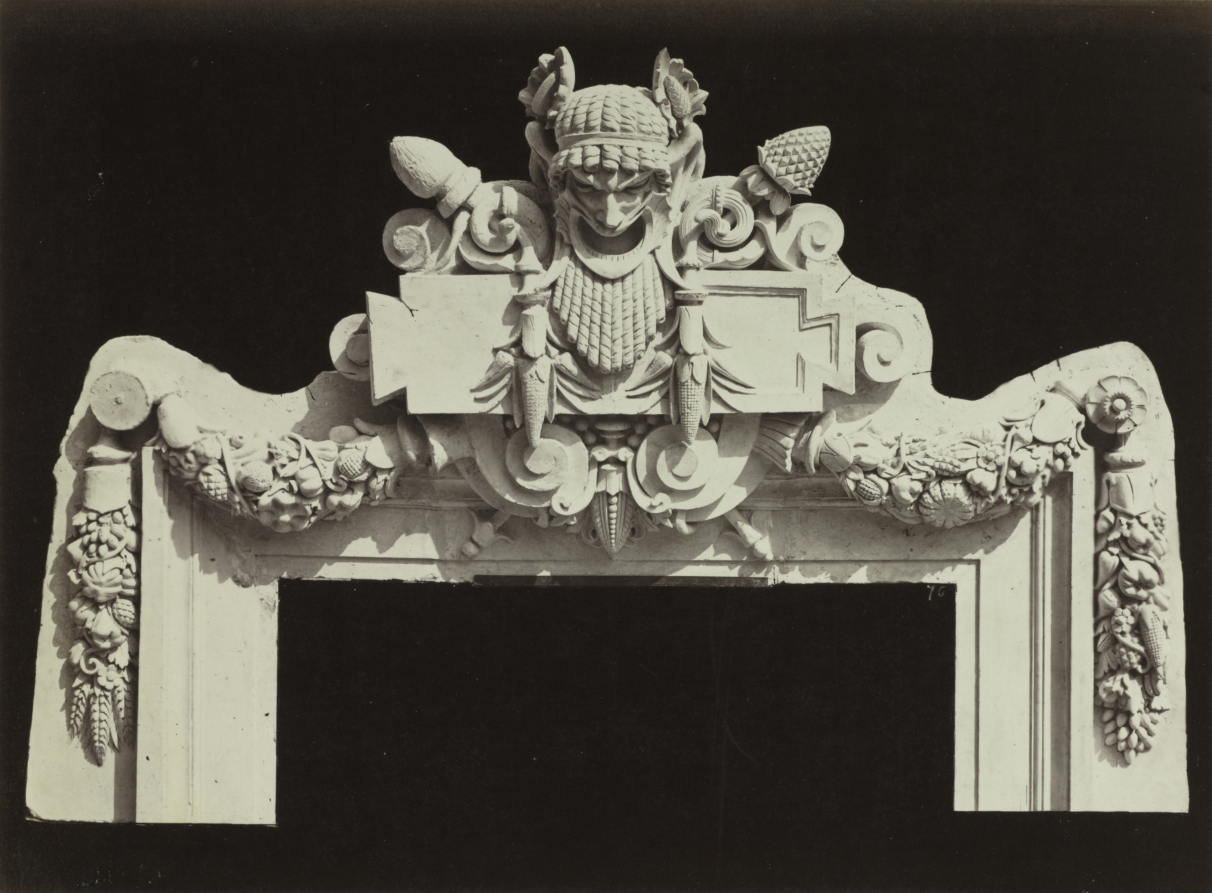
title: Ornamental Scupture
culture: France, 19th century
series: The New Paris Opera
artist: Louis-Émile Durandelle (French, 1839–1917)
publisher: Ducher et Cie., Editeurs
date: c. 1865–72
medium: albumen print from wet collodion negative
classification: Photograph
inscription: none